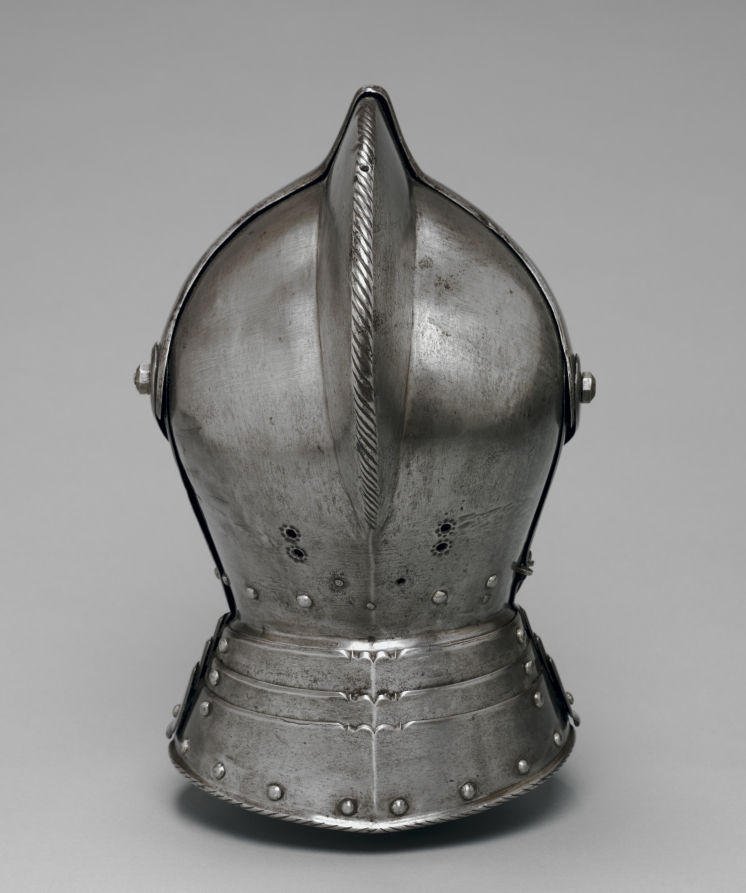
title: Helmet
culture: Germany, Saxony, 16th century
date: c. 1560–80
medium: steel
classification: Arms and Armor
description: This helmet was developed for the joust, a sporting combat of arms between two mounted contestants. This example shows the asymmetry of jousting armor. The participants rode along a wall-like barrier known as a "tilt" with their left sides facing. Consequently, armor on that side of the body tended to be thicker. The breath holes in the helmet were placed on the right side (farthest from an opponent's lance) to avoid injuries from splinters. The popularity of jousts and tournaments peaked around 1500 and required armor and other sporting equipment adapted for the endlessly varied games. By the reign of Emperor Maximilian I (1493–1519), there were at least 11 different forms of mounted jousts, exclusive of the numerous ceremonial combats on foot using such weapons as swords, halberds, pikes, and throwing axes. Each blow in the contest, especially favored in Germany, was carefully numbered and prescribed by rules.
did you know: Jousting contestants wore armor and charged at each other full speed on horseback, attempting to dismount the other with a lance. Such equipment protected contestants from injury, much like the helmet worn by football players today.